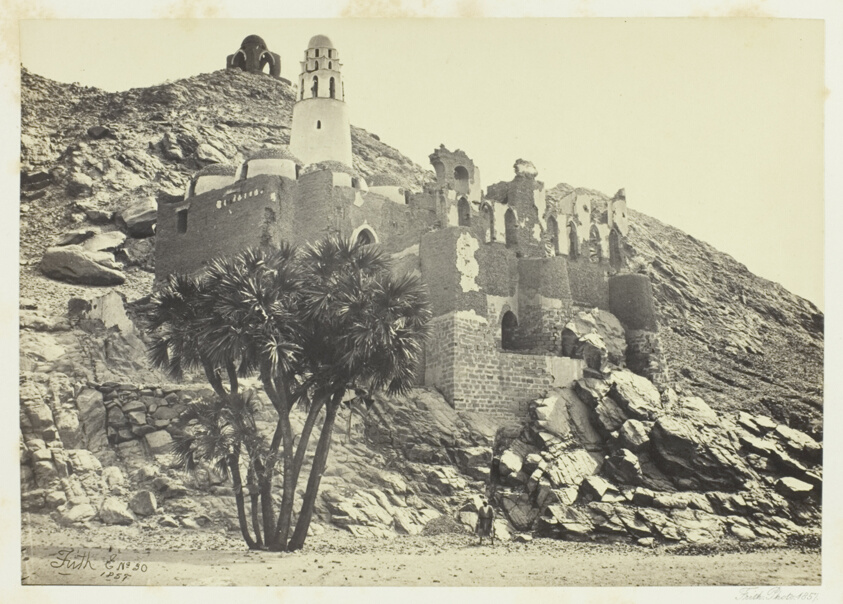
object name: Photograph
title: Doum Palm and Ruined Mosque, Philæ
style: 19th century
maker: Francis Frith (English, 1822–1898)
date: 1857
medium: Albumen print, pl. 28 from the album "Egypt and Palestine, Volume II" (1858/60)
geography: England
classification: albumen silver print; photographic process; photography; photograph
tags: Collected by Hugh Edwards, Egypt and Palestine